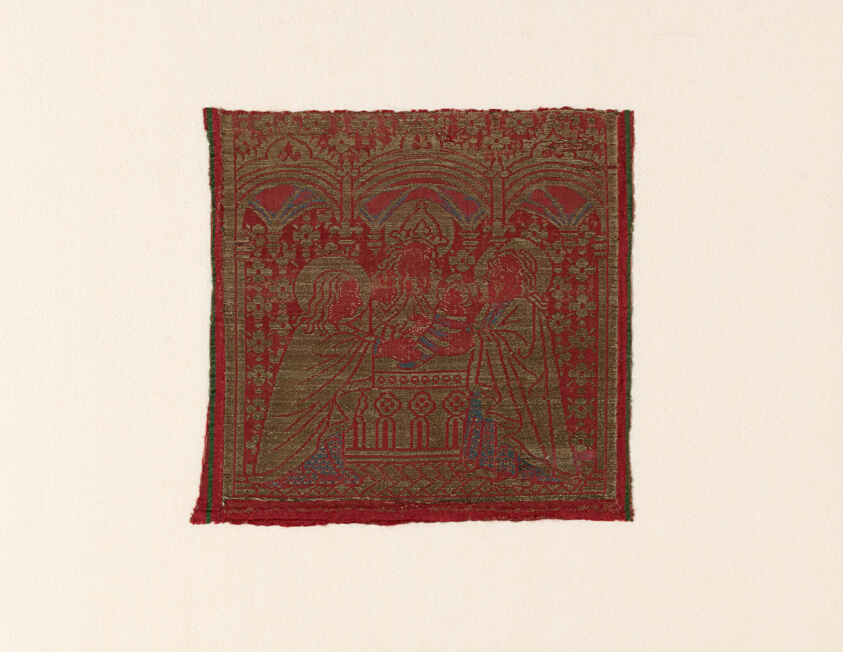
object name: Textile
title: Orphrey Fragment (Depicting the Presentation of Jesus at the Temple)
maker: Italy, Florence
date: 1450/1500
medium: Silk and gilt-animal-substrate-wrapped linen, warp-float faced 4:1 satin weave with weft-float faced 1:2 'S' twill interlacings of secondary binding warps and supplementary patterning and brocading wefts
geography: Florence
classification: textile; weaving; liturgical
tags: religious scenes